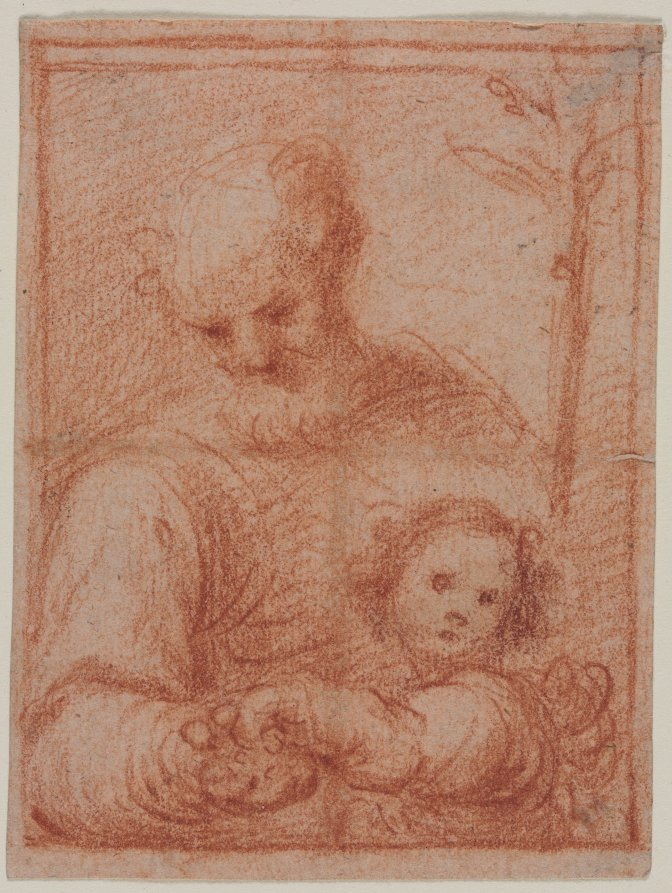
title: Joseph and Child (recto)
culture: Italy, 16th century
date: 16th century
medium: red chalk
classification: Drawing